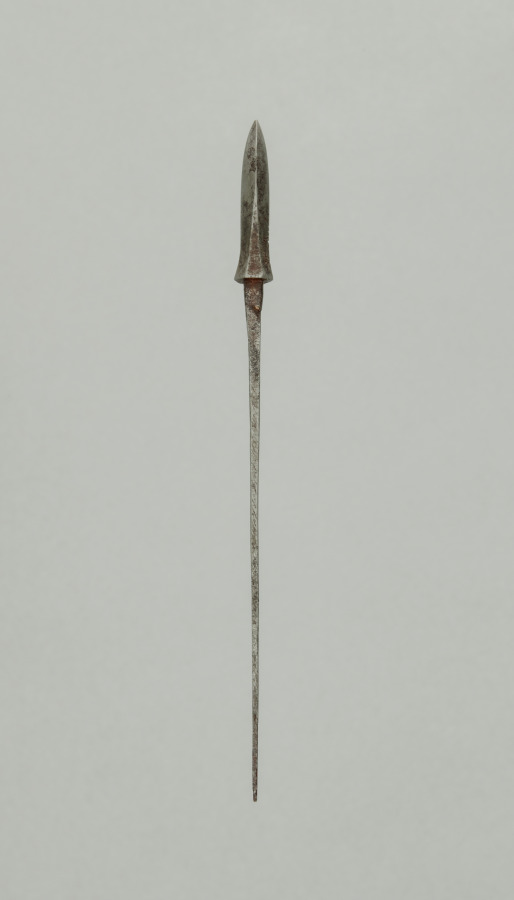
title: Arrow Point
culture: Japan, Edo period (1615–1868)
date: 1700s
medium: steel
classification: Arms and Armor